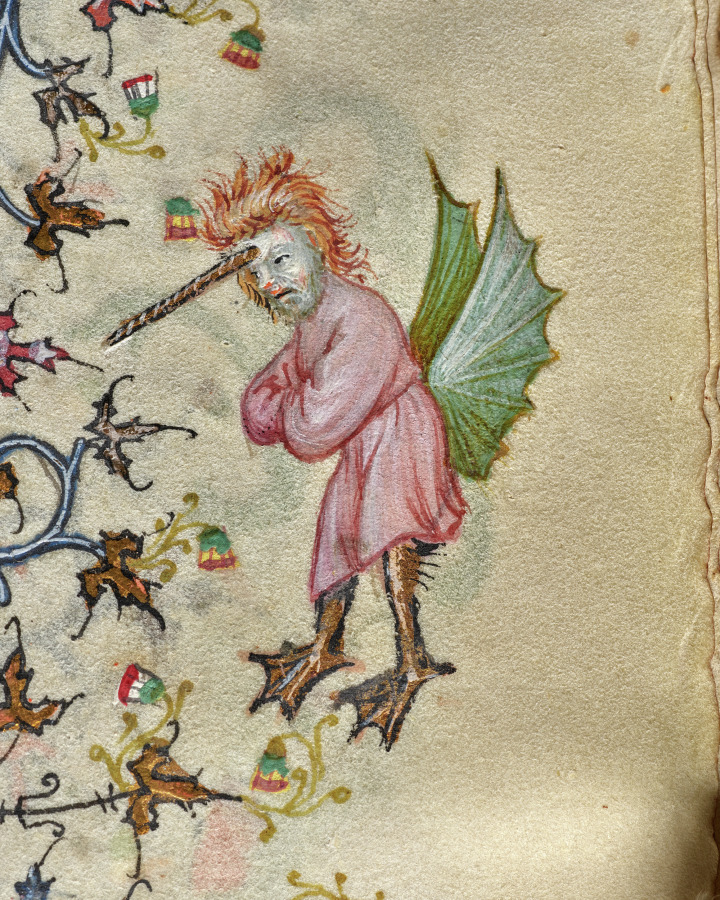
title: Hours of Charles the Noble, King of Navarre (1361-1425): fol. 289r, St. Germain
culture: France, Paris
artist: Master of the Brussels Initials and Associates (French)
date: c. 1405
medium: ink, tempera, and gold on vellum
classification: Bound Volume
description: This precious volume was obviously highly prized by its owner, the French-born King of Navarre, who had his coat of arms painted on no less than twenty folios. Rather than directly commissioning this manuscript from a specific workshop, it seems that Charles the Noble acquired his book of hours -- perhaps ready-made for the luxury market -- while on a trip to Paris in 1404-05. A collaborative effort, six painting styles are evidenced within the pages of this codex, those of two Italians, two Frenchmen, and two Netherlanders. The painter who was responsible for the planning and decoration of the book, and who produced seventeen of the large miniatures, was a Bolognese artist known as the Master of the Brussels Initials. His principal assistant, responsible for most of the borders, was a Florentine who signed his name "Zecho" da Firenze on folio 208 verso.